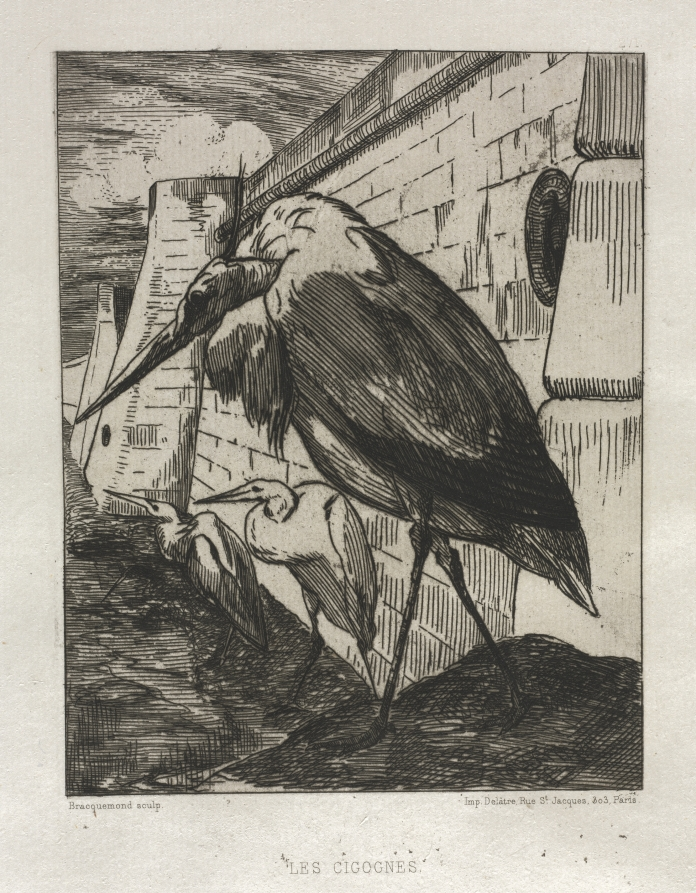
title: The Storks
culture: France, 19th century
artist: Félix Bracquemond (French, 1833–1914)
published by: Cadart & Luquet, Paris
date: 1865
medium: etching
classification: Print